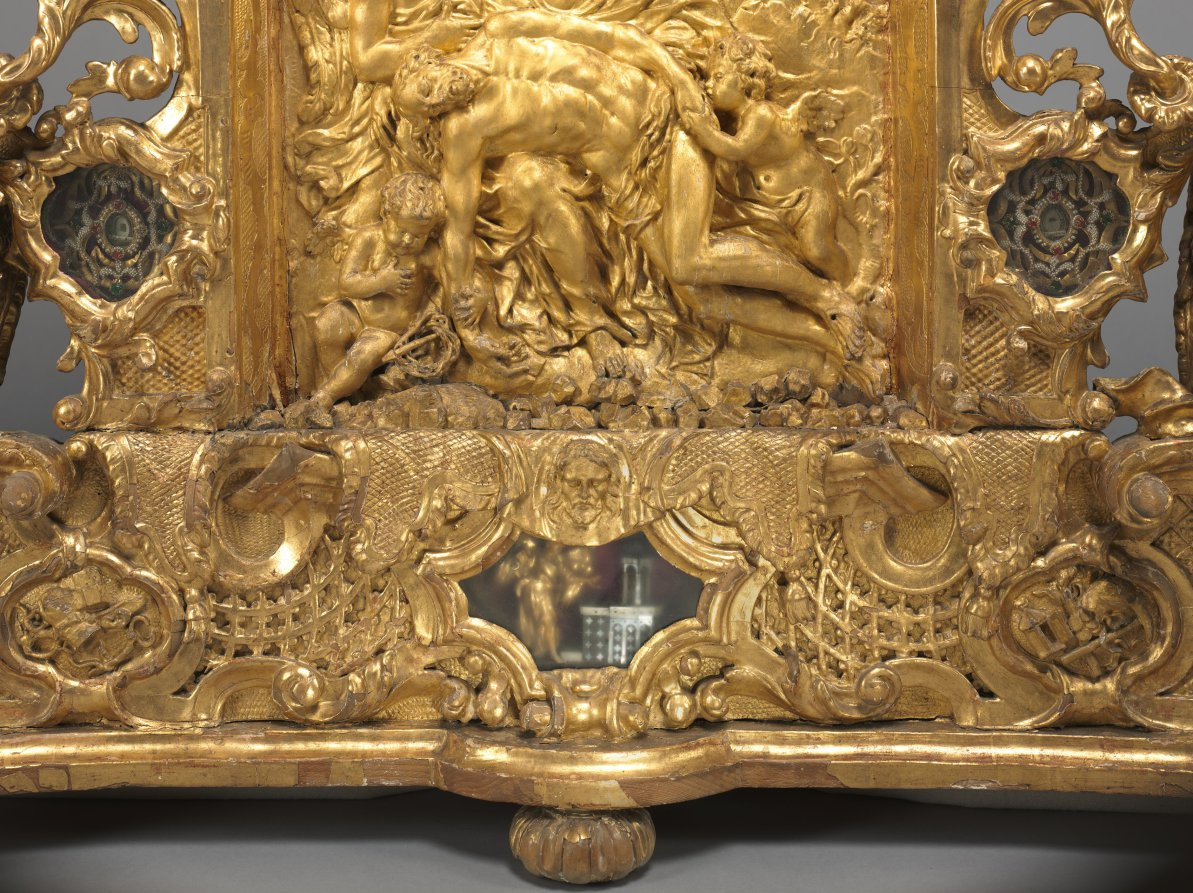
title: Altarpiece with Relics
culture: Germany, Bavaria, 18th century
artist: Joseph Matthias Götz (German, 1696–1760)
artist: and Workshop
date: c. 1735–40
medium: gilded wood, with relics in niches: gilded wood, mother-of-pearl, ebony, red silk, gold wire, seed pearls, rock crystal, pen and ink on paper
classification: Sculpture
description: Götz covers every surface in gold leaf, giving each part of the object equal importance, rather than simply framing a central picture. In this distinctively Central European approach, figural narrative is subordinate to the overall ensemble. Götz designed this object to rest on top of an altar, probably in front of a larger painted or sculpted decorative scheme. The work contains relics seen through the small windows on the perimeter. These small remains of holy figures demonstrate the persistence of a medieval Catholic tradition well into the 1700s.